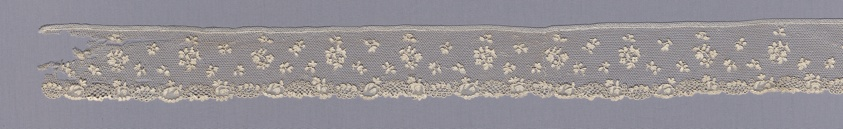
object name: Textile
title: Border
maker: France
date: 1775/1800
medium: Linen, needle lace of a type known as "Point d'Argentan" with buttonholed mesh ground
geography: France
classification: textile; lace - needle